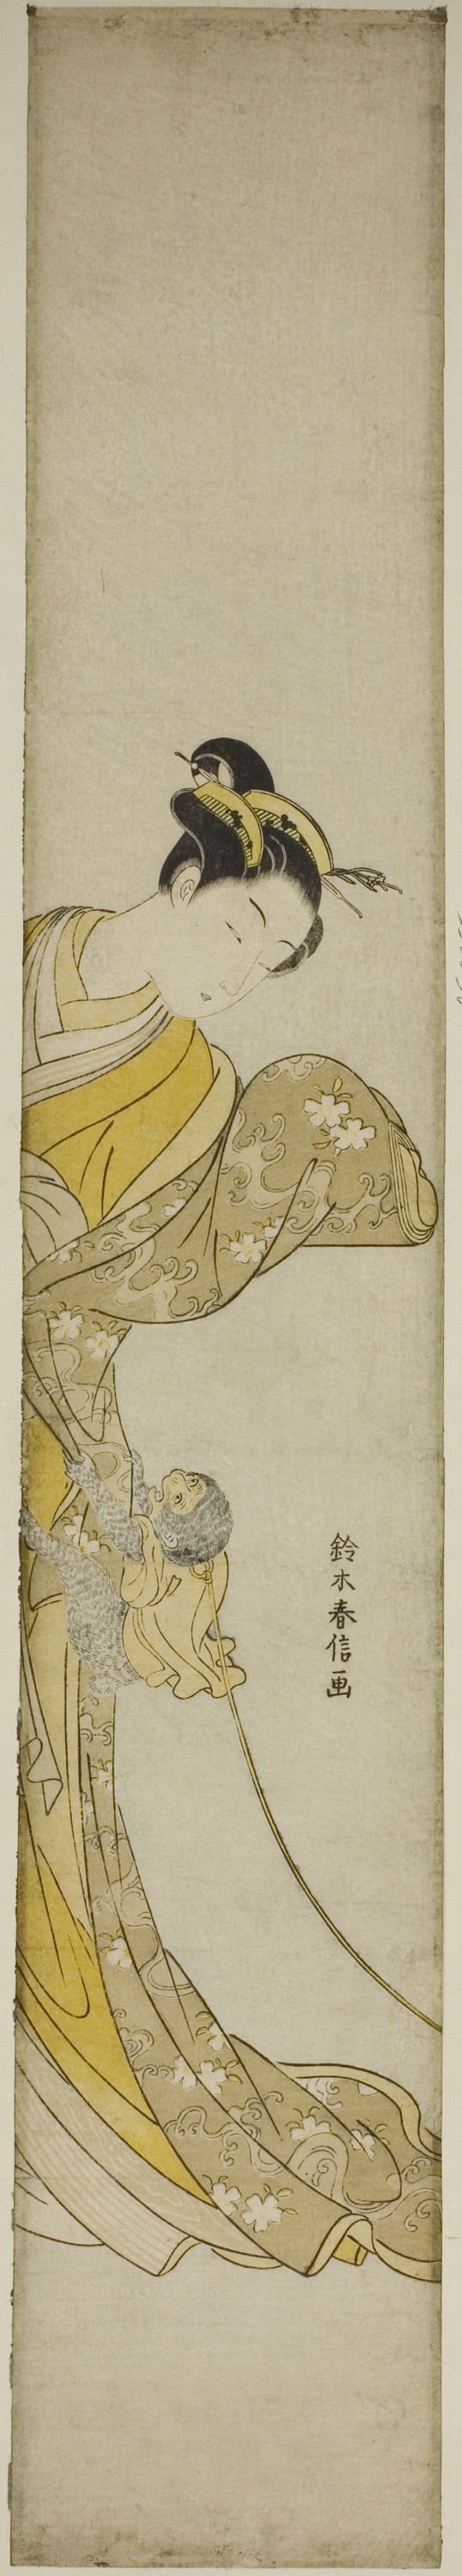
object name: Print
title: Woman with Pet Monkey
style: Japanese (culture or style)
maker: Suzuki Harunobu 鈴木 春信; Japanese, 1725 (?)-1770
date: c. 1767/68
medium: Color woodblock print; hashira-e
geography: Japan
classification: woodblock print; print; asian art